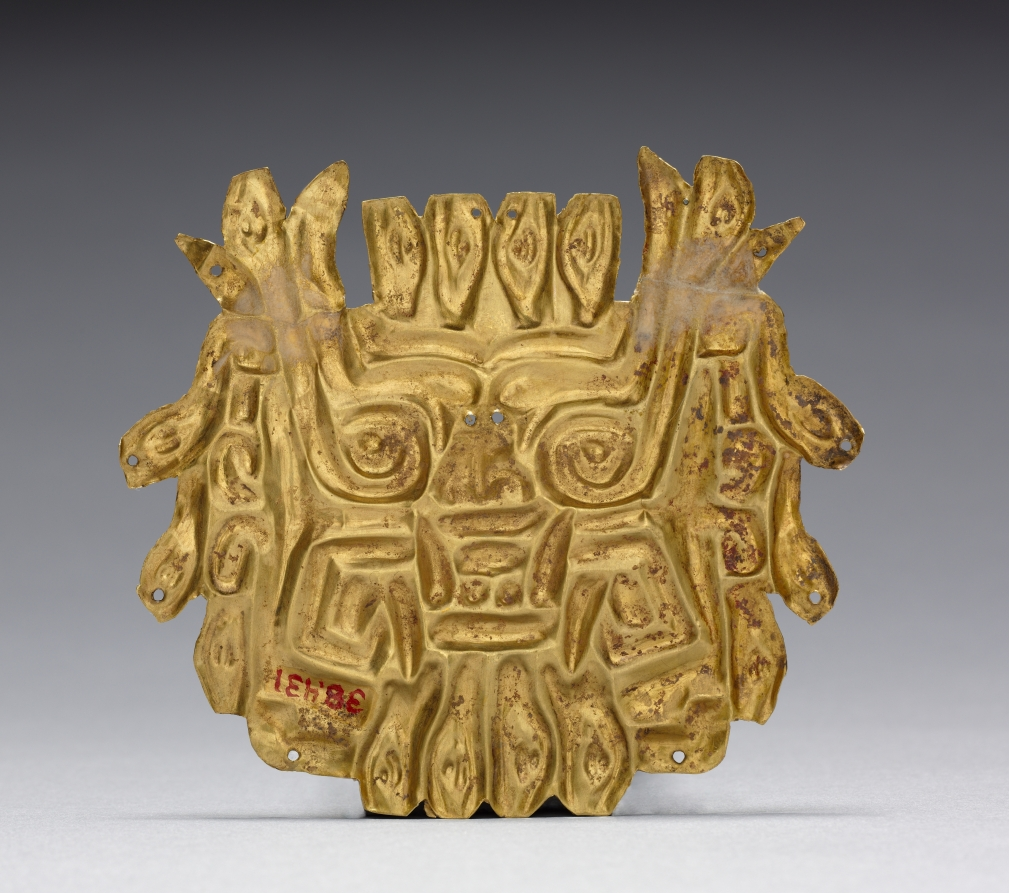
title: Plaque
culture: Peru, North Coast, Chongoyape(?), Chavín style (900-200 BCE)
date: c. 500–200 BCE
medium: hammered and cut gold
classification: Jewelry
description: These plaques showing a powerful Chavín deity may come from a group of gold objects found in a lavish tomb in the 1920s. One is shaped as the deity’s fanged head, its fur transformed into sixteen serpents that edge the plaque. On the other, the deity’s visually elusive body also appears: the clawed hands over the chest may clutch a horizontal staff, an emblem of authority; across the waist is a belt that sprouts serpents; and beneath are the legs and feet, which stand atop fanged masks.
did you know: Hammered gold ornaments have been produced in the Andes since 1500 BCE.